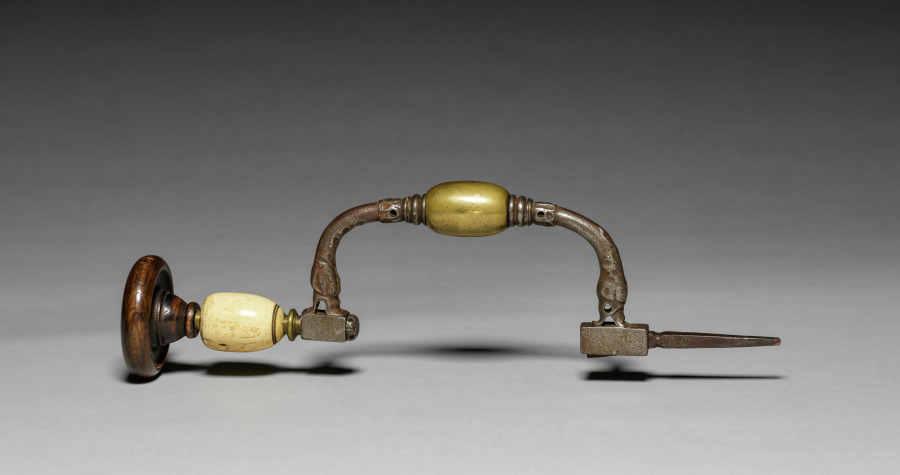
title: Brace and Bit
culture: Germany ?, 17th century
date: 1600s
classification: Tool